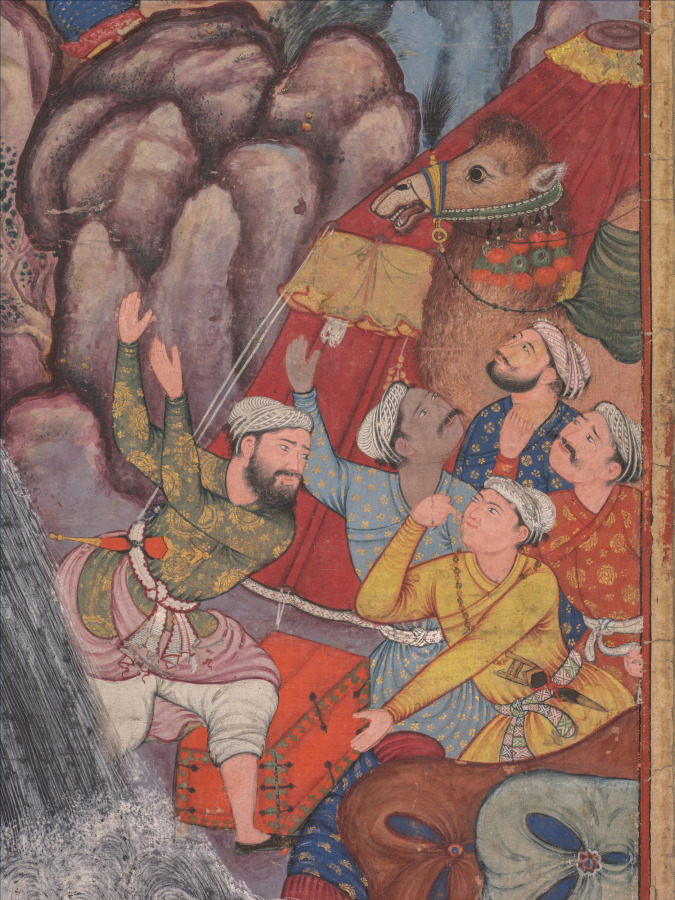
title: Alamshah cleaving asunder the chain of the wheel, from volume 11 of a Hamza-nama (Adventures of Hamza)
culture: Mughal India, court of Akbar (reigned 1556–1605)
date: c. 1560s–70s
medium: Gum tempera, ink, and gold on cotton and paper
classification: Painting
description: The hero, Alamshah the Greek, perches on a cliff above a rushing torrent of water. He has just slain the villain who raised the massive bronze plug on the dam in order to wash away the camp of Alamshah’s father, Hamza. The Hamza-nama recounts the adventures of an uncle of the Prophet Mohammed. It was the first major undertaking of the fledgling painting workshop created by Akbar. Originally in 14 volumes of 100 illustrations each, just a little more than 10 percent of the pages survive.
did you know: The title in the bottom margin is a continuation of the text on the previous page.